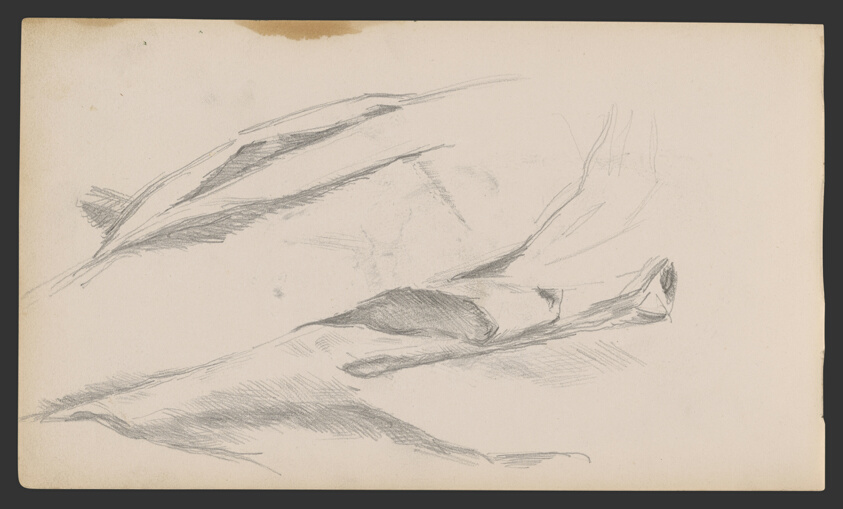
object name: Drawing and Watercolor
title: Sketchbook No. 2 (L'Estaque)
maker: Paul Cézanne; French, 1839-1906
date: 1875–86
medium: Graphite and pen and ink drawings on paper, bound into a book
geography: France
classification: sketchbook; graphite; prints and drawing; paper